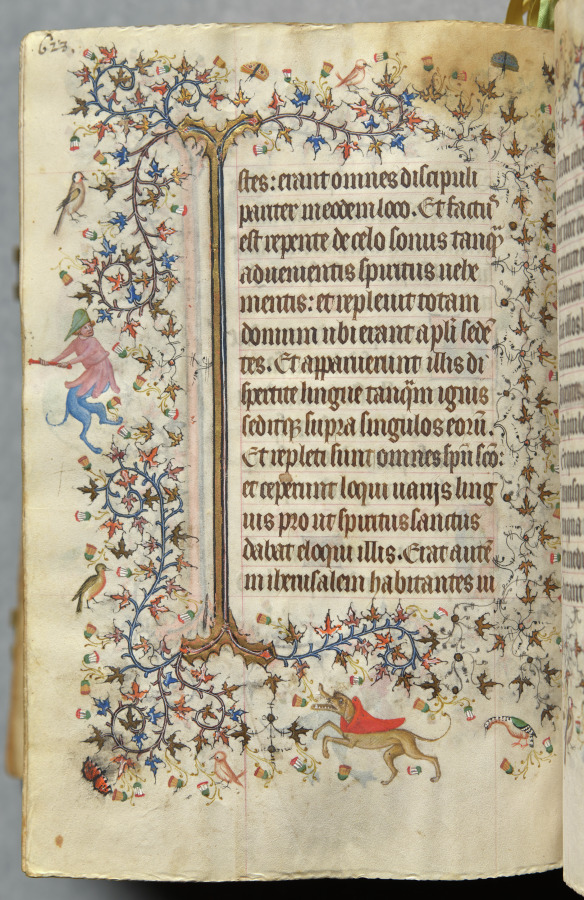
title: Hours of Charles the Noble, King of Navarre (1361-1425): fol. 308v, Text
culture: France, Paris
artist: Master of the Brussels Initials and Associates (French)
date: c. 1405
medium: ink, tempera, and gold on vellum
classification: Bound Volume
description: This precious volume was obviously highly prized by its owner, the French-born King of Navarre, who had his coat of arms painted on no less than twenty folios. Rather than directly commissioning this manuscript from a specific workshop, it seems that Charles the Noble acquired his book of hours -- perhaps ready-made for the luxury market -- while on a trip to Paris in 1404-05. A collaborative effort, six painting styles are evidenced within the pages of this codex, those of two Italians, two Frenchmen, and two Netherlanders. The painter who was responsible for the planning and decoration of the book, and who produced seventeen of the large miniatures, was a Bolognese artist known as the Master of the Brussels Initials. His principal assistant, responsible for most of the borders, was a Florentine who signed his name "Zecho" da Firenze on folio 208 verso.